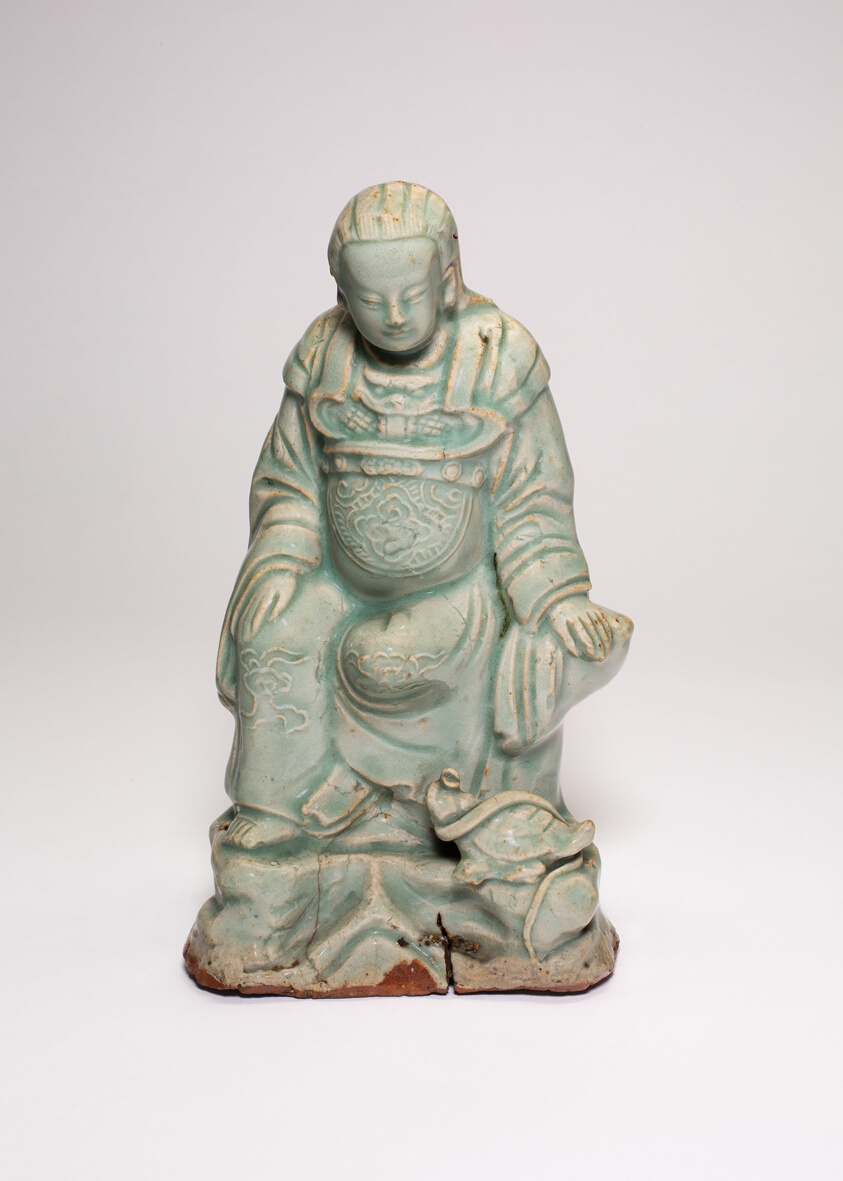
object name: Vessel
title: Figure of Daoist God Zhenwu (Perfected Warrior)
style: Chinese (culture or style)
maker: China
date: Ming (1368–1644) or Qing dynasty (1644–1911), 15th/18th century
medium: Celadon-glazed stoneware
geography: Junyao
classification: porcelain; asian art; ceramics; vessel